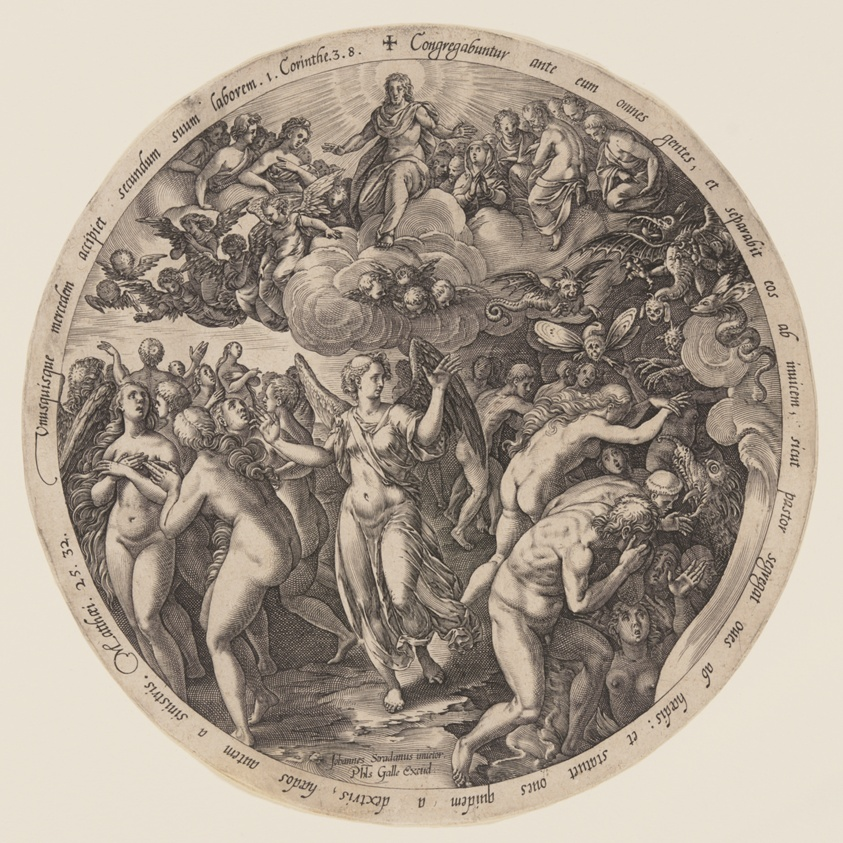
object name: Print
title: The Separation of the Blessed and the Damned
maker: Hendrick Goltzius (Dutch, 1558–1617); after Jan van der Straet (Flemish, 1523–1605)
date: c. 1578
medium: Engraving on ivory laid paper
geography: Netherlands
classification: engraving; paper; print; prints and drawing